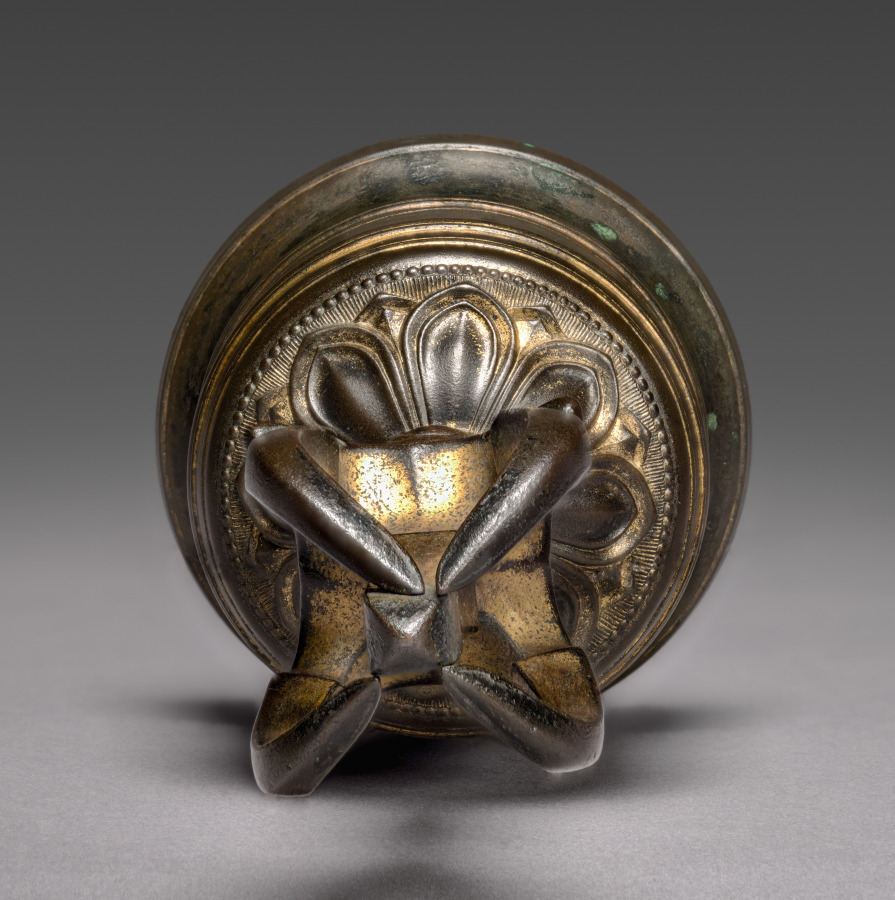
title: Five-pronged Vajra Bell (Gokorei)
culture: Japan, Kamakura period (1185–1333)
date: early 1300s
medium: gilt bronze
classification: Metalwork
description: The five prongs of this bell symbolize the Buddhist “Five Perfections”—generosity, morality, patience, perseverance, and concentration. The mouth of the bell symbolizes the “Sixth Perfection” of wisdom. The bell was used in Japanese Esoteric Buddhist rituals along with vajra pestles, or kongōsho.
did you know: Vajras are symbolic weapons, representing the properties of a diamond (indestructibility) and a thunderbolt (irresistible force), still used in Buddhist ceremonies today.